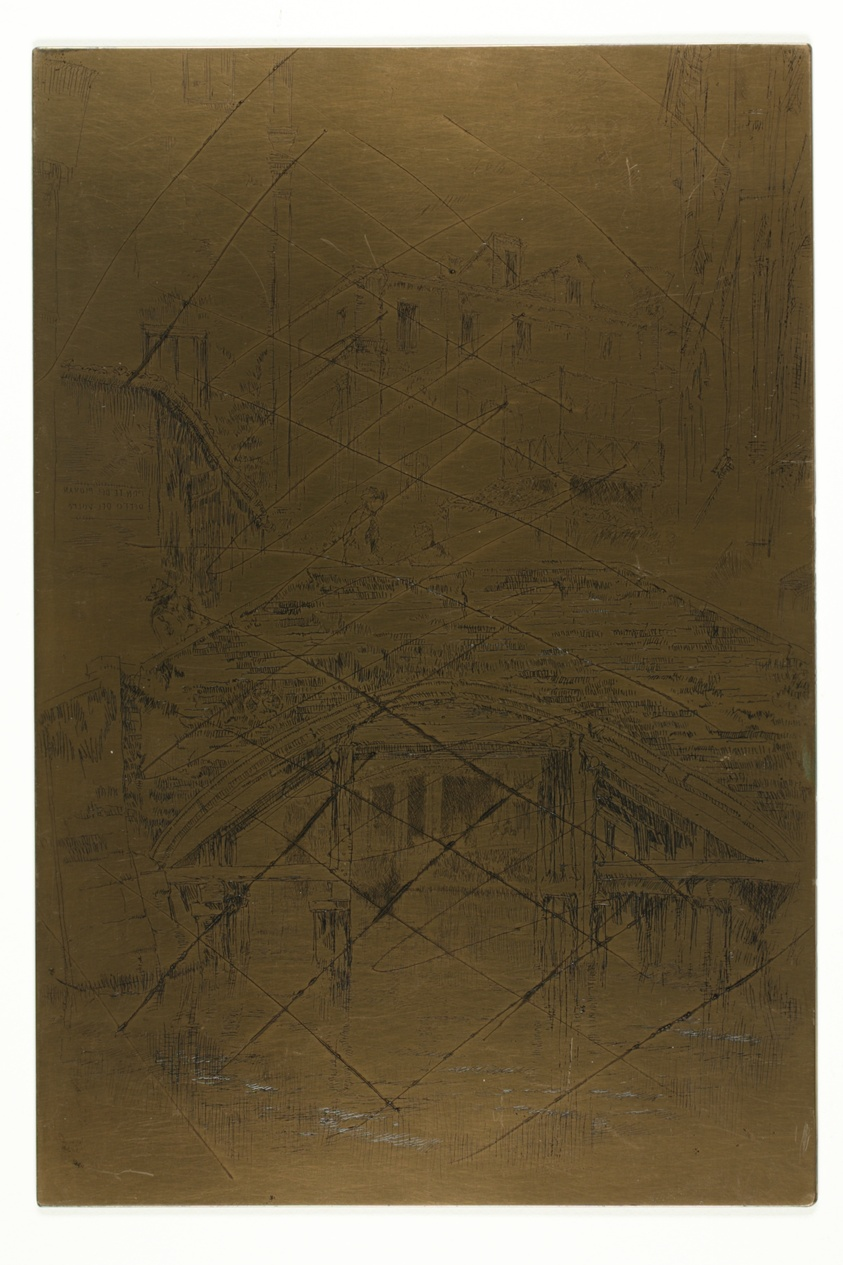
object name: Print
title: Ponte del Piovan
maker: James McNeill Whistler (American, 1834-1903)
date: 1879/80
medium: Cancelled copper plate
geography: United States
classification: copper plate; prints and drawing; matrix; print